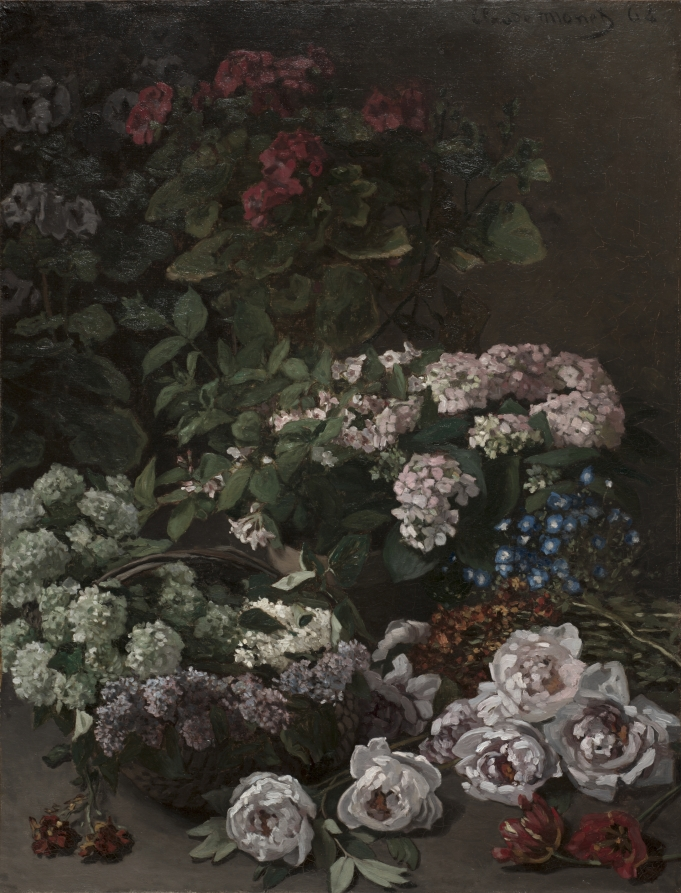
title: Spring Flowers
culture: France, 19th century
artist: Claude Monet (French, 1840–1926)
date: 1864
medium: oil on fabric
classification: Painting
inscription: Signed upper right corner: Monet 64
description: This early work reveal's Monet's fascination with capturing the transitory effects that became the primary focus of his later innovations. Painted with almost scientific accuracy, this still life has a freshness and immediacy derived partly from its composition. Isolated against a dark background, the fully mature peonies, potted hydrangeas, and basketed lilacs spill downward and outward from the geraniums at the rear. At the same time, Monet's energetic brushwork conveys the sparkling play of light on leaves and petals.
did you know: Monet is quoted as saying, "I perhaps owe having become a painter to flowers." He painted this work in 1864, the first productive year of his career.